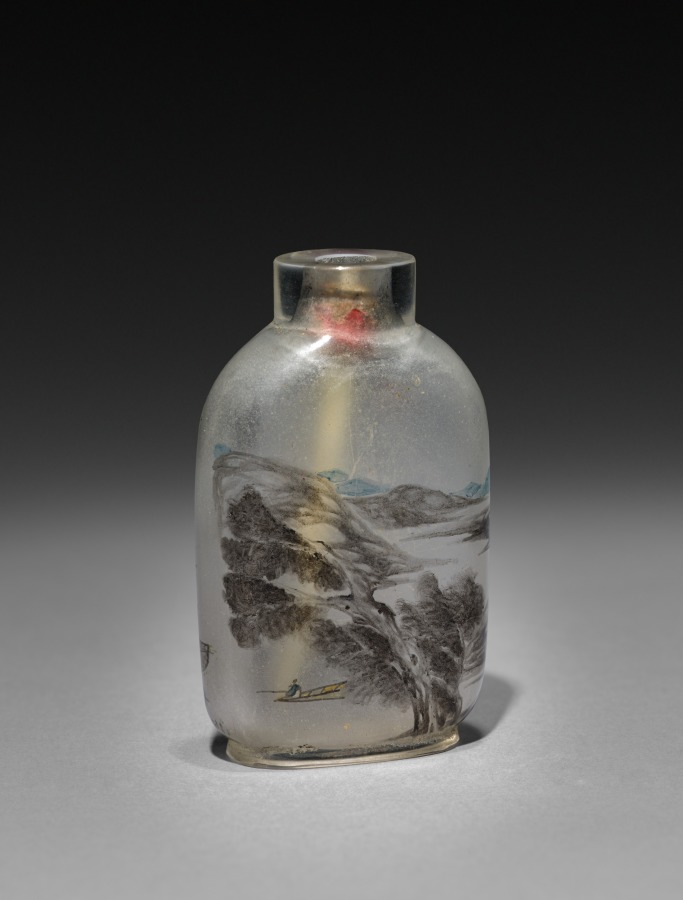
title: Snuff Bottle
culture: China, Qing dynasty (1644-1911)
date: 1644–1911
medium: glass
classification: Glass